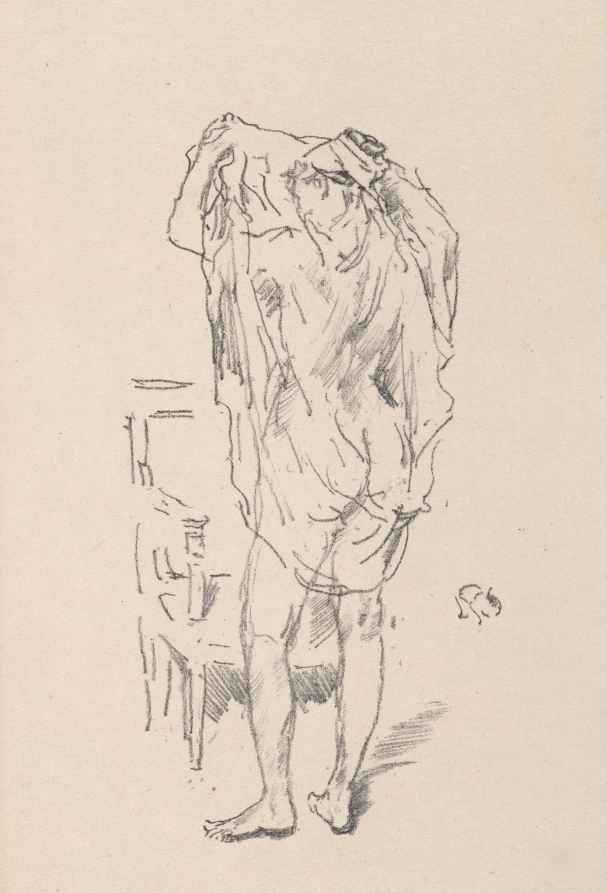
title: Study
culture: America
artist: James McNeill Whistler (American, 1834–1903)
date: 1895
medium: lithograph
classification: Print